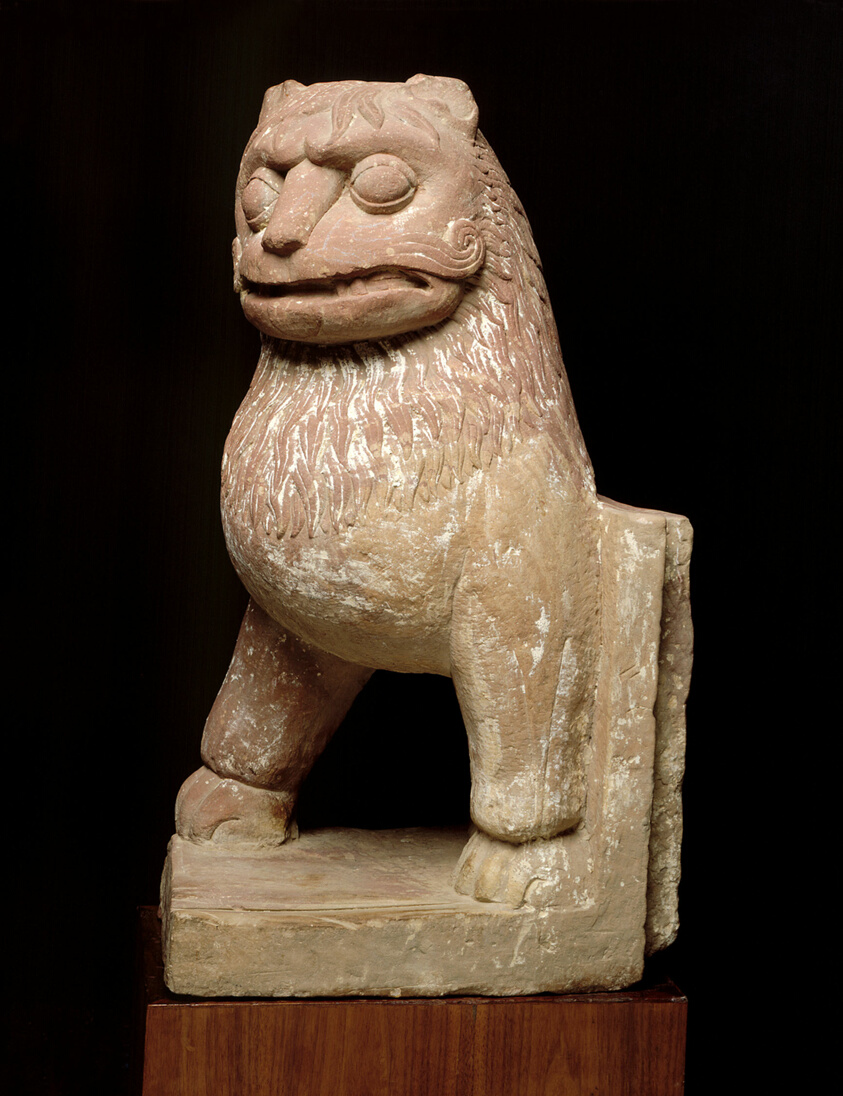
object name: Architectural fragment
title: Lion Protome, probably for a Throne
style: South Asian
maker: India; Uttar Pradesh, Mathura region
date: c. 2nd century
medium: Spotted red sandstone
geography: Mathura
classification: sandstone; stone; sculpture; asian art; architectural fragment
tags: animals